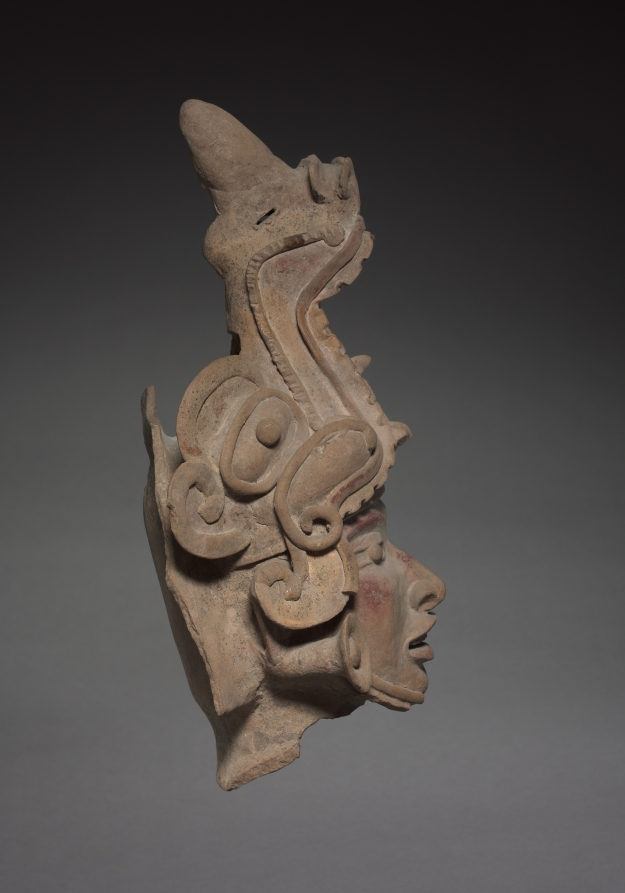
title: Head with Animal Helmet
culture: Mexico, Gulf Coast, San Andrés Tuxtla(?)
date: c. 600–1000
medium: earthenware, pigment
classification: Sculpture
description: The Gulf Coast of Mexico was an important center of ceramic sculpture production for more than 2,000 years. Nearly life-size hollow effigies, produced after about AD 600, are among the most spectacular works from this region. Although the faces were sometimes made with molds, this example appears to be hand-modeled. The mythical serpent helmet indicates that the figure may be a ritual performer.